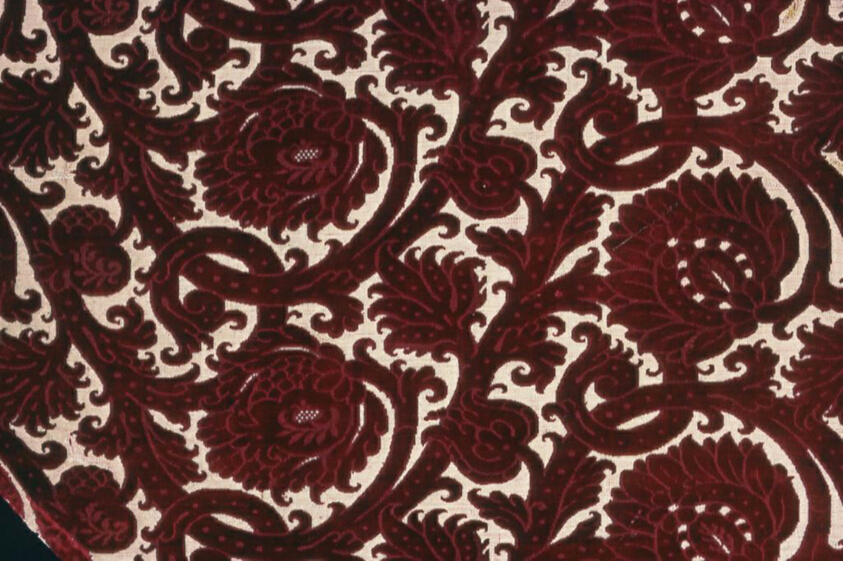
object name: Textile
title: Panel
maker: France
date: 1601/1725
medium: Silk and gilt-metal strip, warp-float faced twill weave; with supplementary patterning warps forming cut and uncut pile (velvet) with voided areas; supplementary patterning wefts and binding warp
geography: France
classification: textile; weaving; weaving - velvet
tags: flowers, foliage